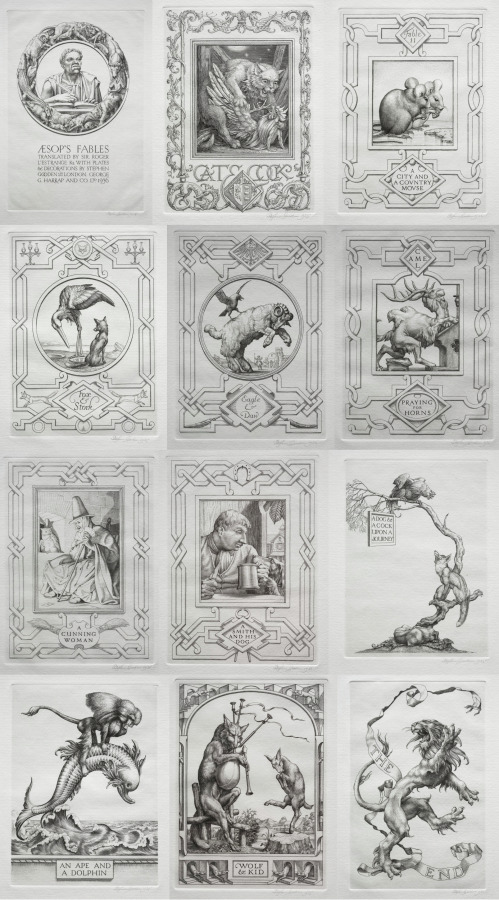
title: Aesop's Fables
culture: England, 20th century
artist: Stephen Gooden (British, 1892–1955)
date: 1936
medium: engraving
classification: Portfolio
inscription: signed in pencil, lower right margin: Stephen Gooden 1935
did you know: Stephen Gooden was also a well-known bookplate designer; one of his designs was for the royal library at Windsor Castle.